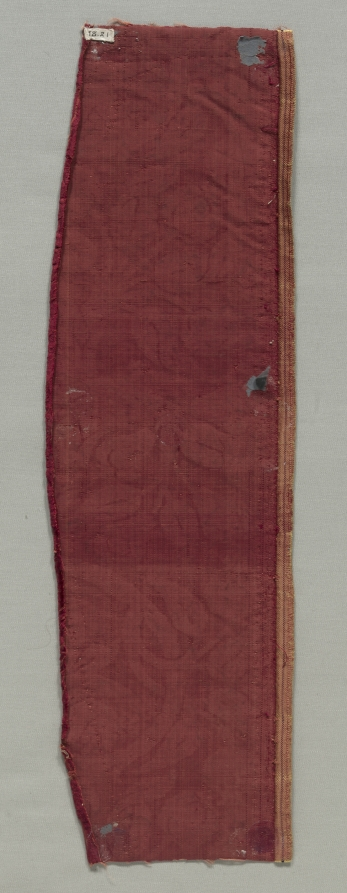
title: Fragment with Floral Pattern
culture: Spain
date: 1600s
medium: velvet with two levels of cut pile; silk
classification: Velvet